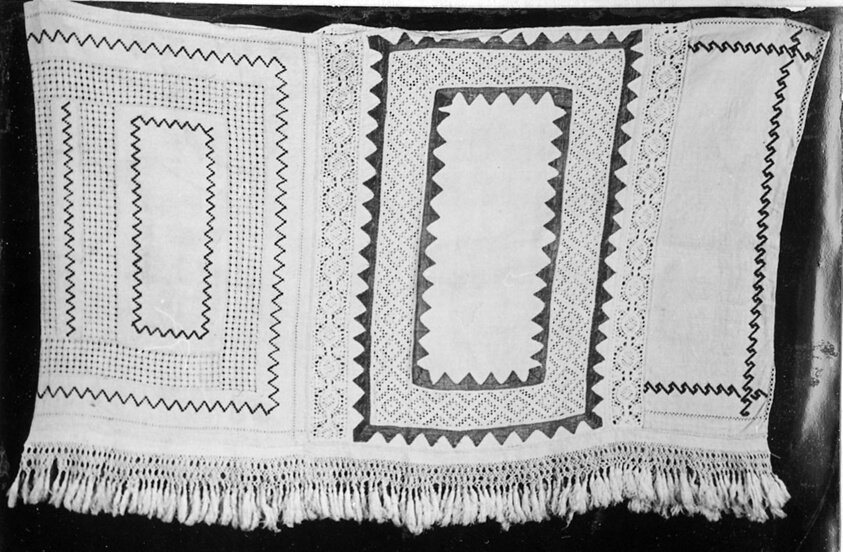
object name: Religious/Ritual Object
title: Altar Cover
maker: Spain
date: 19th century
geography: Spain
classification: textile; liturgical; needlework (visual works); altar; ritual objects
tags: altar